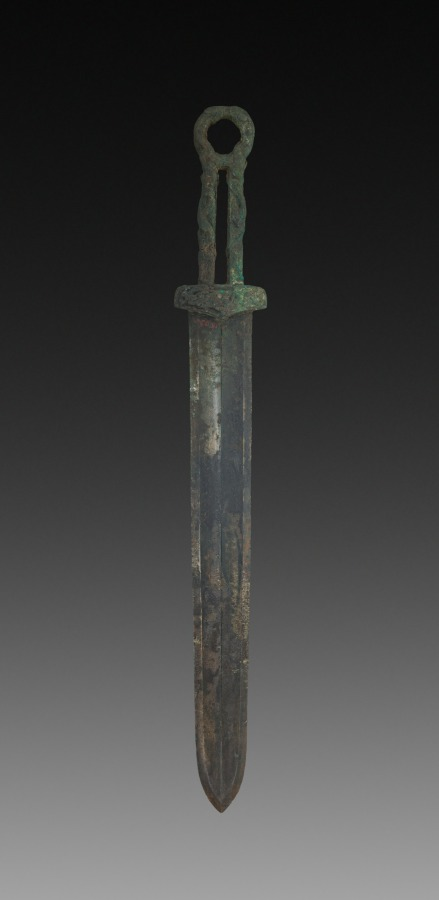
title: Sword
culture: China, Han dynasty (202 BCE–220 CE)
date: 206 BCE–220 CE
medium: bronze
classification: Arms and Armor